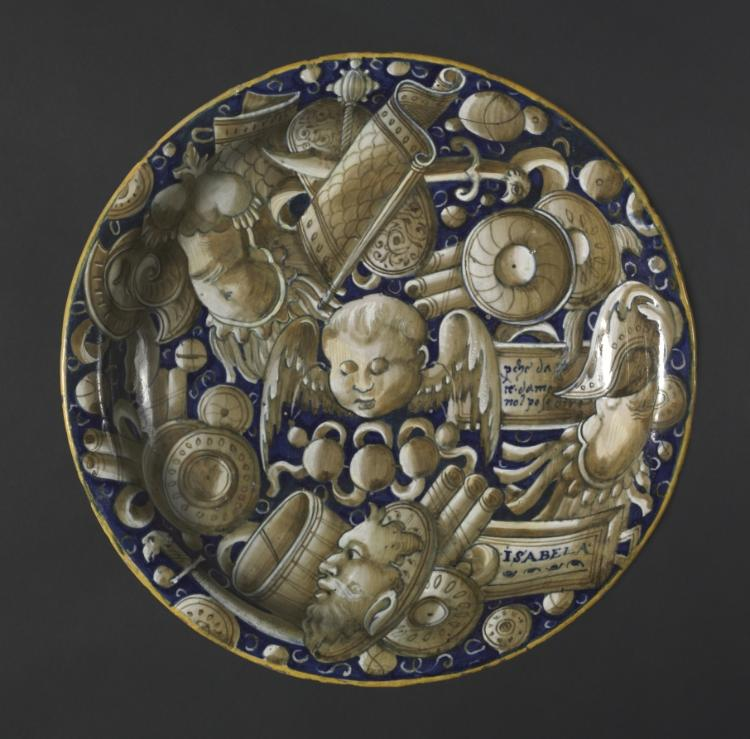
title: Plate with Putto, Masques, and Trophies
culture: Italy, Urbino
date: c. 1530–50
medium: tin-glazed earthenware (maiolica)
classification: Ceramic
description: During the Italian Renaissance of the 1400s and 1500s, nobles and merchants eager to express their wealth and sophistication ordered ceramics for dining, display, and storage. Known as maiolica, because it resembled the brightly colored ceramics from the Mediterranean island of Majorca, these ceramic vessels were covered with a tin glaze that provided an opaque white surface on which colorful decoration and coats of arms as well as mythological or literary stories could be painted.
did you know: In combination, the arms, armor, and winged head of a cherub depicted on this plate symbolize war—a common theme in the midst of the Great Wars of Italy (1494–1559).